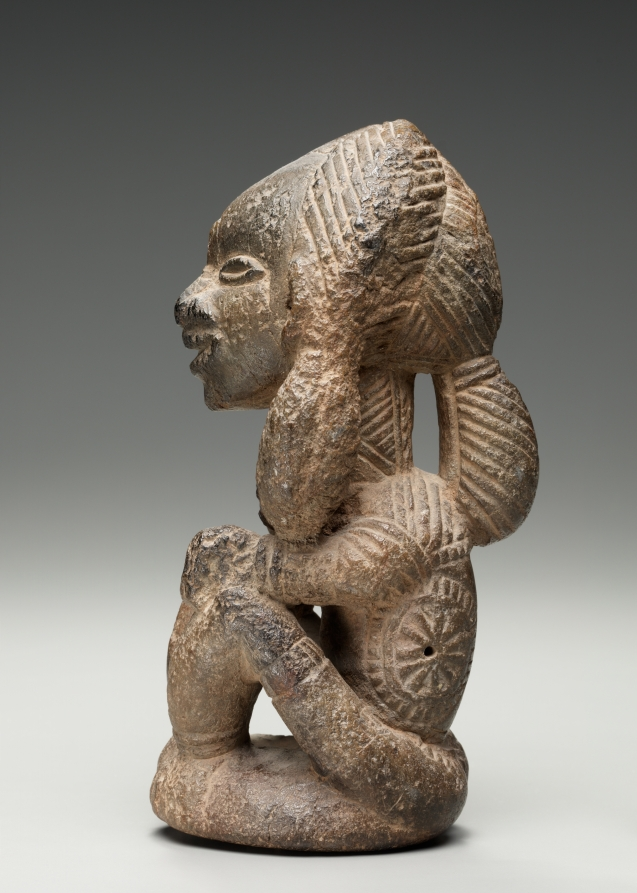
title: Figure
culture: Africa, West Africa, Sierra Leone, Sapi-style carver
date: possibly early 1400s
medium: soapstone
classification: Sculpture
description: The most varied group of soapstone figures and heads has been found in the homelands of the Kissi. Calling them pomda ("images of the dead"), the Kissi placed them in ancestral shrines, offering them the last seeds at sowing times and the first fruits of the harvest. However, the sculptures are believed to have been made centuries ago by the ancestors of the Kissi, the so-called Sapi people.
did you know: Sapi sculptors worked in stone—like in this sculpture—as well as ivory.